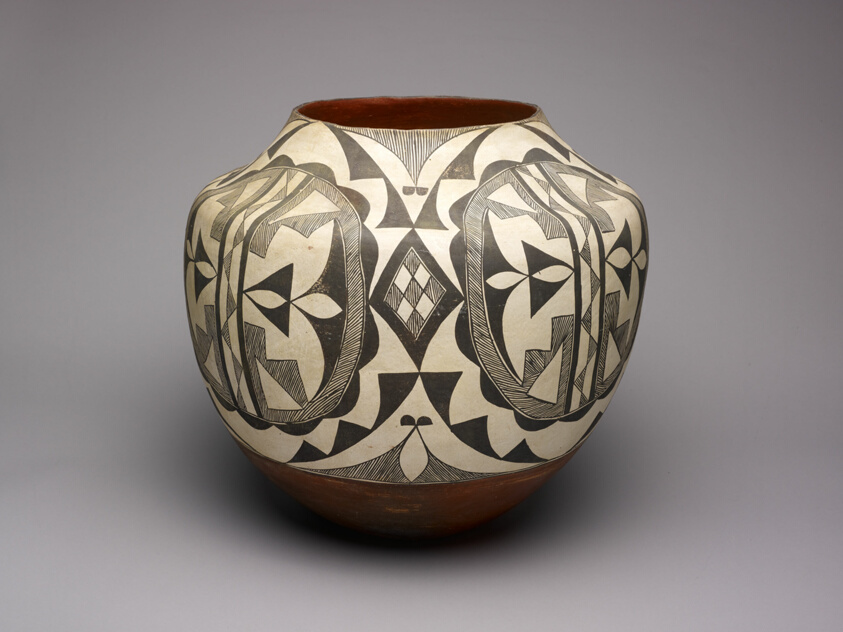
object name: Vessel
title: Black-and-White Storage Jar with Abstract Geometric Motifs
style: acoma, southwest, pueblo, americas, native american, native north american, Arts of the Americas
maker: Acoma; Acoma Pueblo, New Mexico, United States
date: 1890s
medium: Ceramic (earthenware) and pigment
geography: New Mexico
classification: vessel; ceramics; art of the americas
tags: geometric, water, storage, servingware, patterns, floral, plant-derived motif